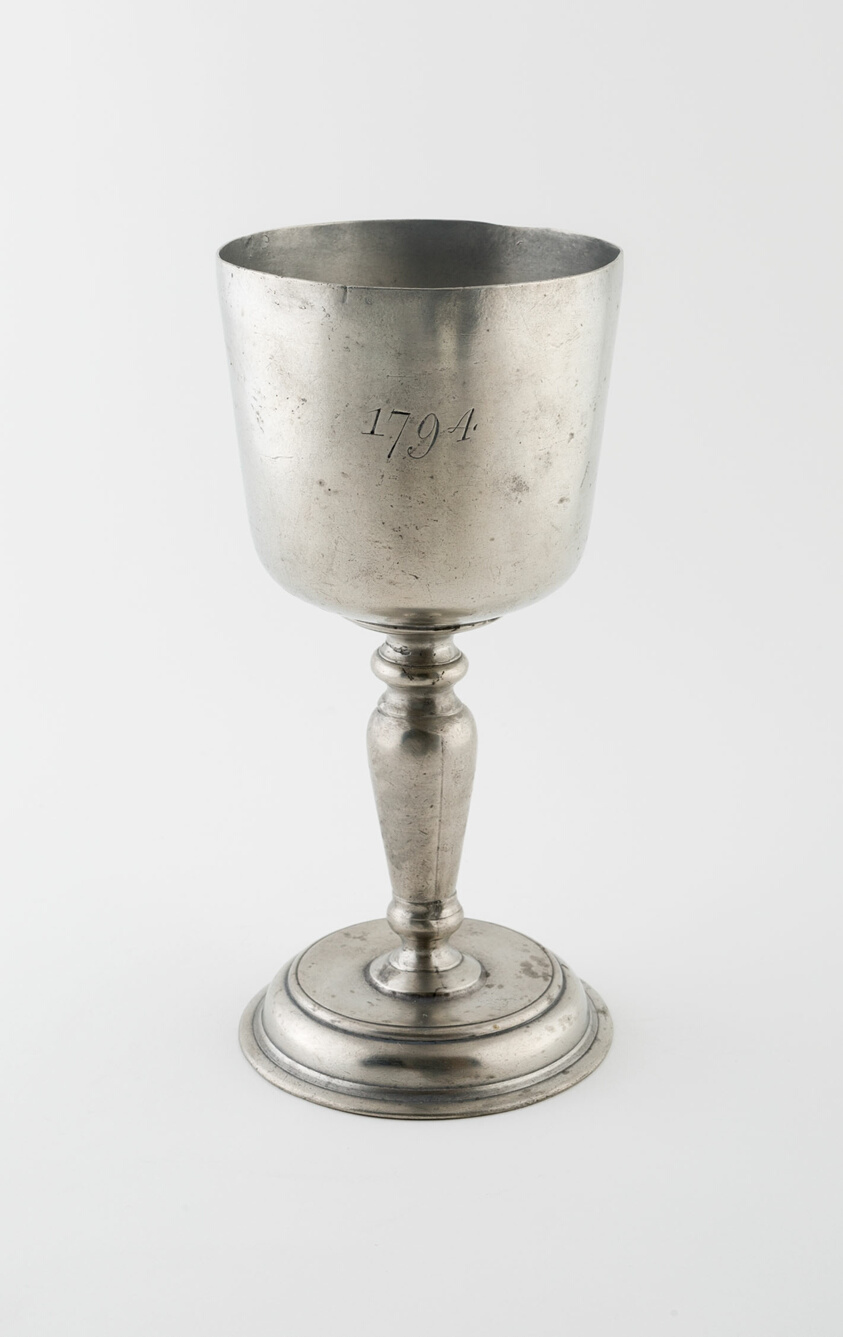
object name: Metalwork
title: Communion Chalice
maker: Stephen Maxwell & Co.; Scotland, active c. 1781-c. 1800; Glasgow, Scotland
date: c. 1794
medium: Pewter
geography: Glasgow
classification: drinking vessel; liturgical; metalwork